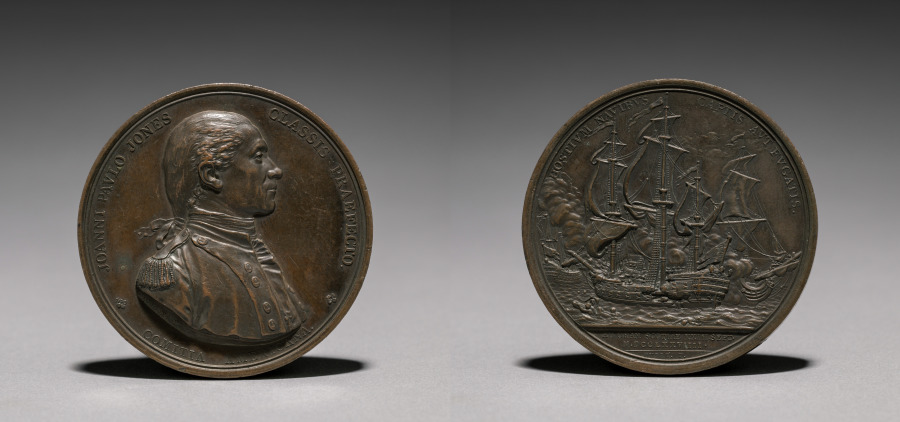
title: Medal: John Paul Jones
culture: France, 19th century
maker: Augustin Dupré (French, 1748–1833)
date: 1779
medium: bronze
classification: Metalwork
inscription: Joanni Pavlo Jones classis Praefecto. Comita Americana.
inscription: HOSTIVM NAVIBVS CAPTIS AVT FT GATIS.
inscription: AD ORAM SCOTIAE XXIII. SEPT. M. DCCLXXVIIII. DUPRE F.